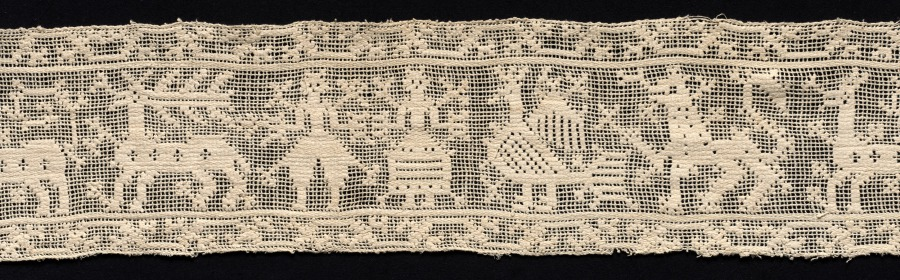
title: Band with Parade of Human Figures, Stags, and Other Fantastic Animals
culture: Italy, Sicily ?, 1500s-1600s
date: 1500s-1600s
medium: Bleached linen (est.): needle lace, burato (twined ground and darned in one direction)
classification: Lace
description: Animals viewed in profile, some with their legs raised, indicate movement, such as a parade or procession. However, the human figures are shown frontally. Linear elements protruding from their backs and hands held out and open suggest the figures may be angels modeling a gesture of prayer.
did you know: Myrta Leonora Jones, the donor of this lace, was a women’s rights activist in Cleveland in the early 1900s.